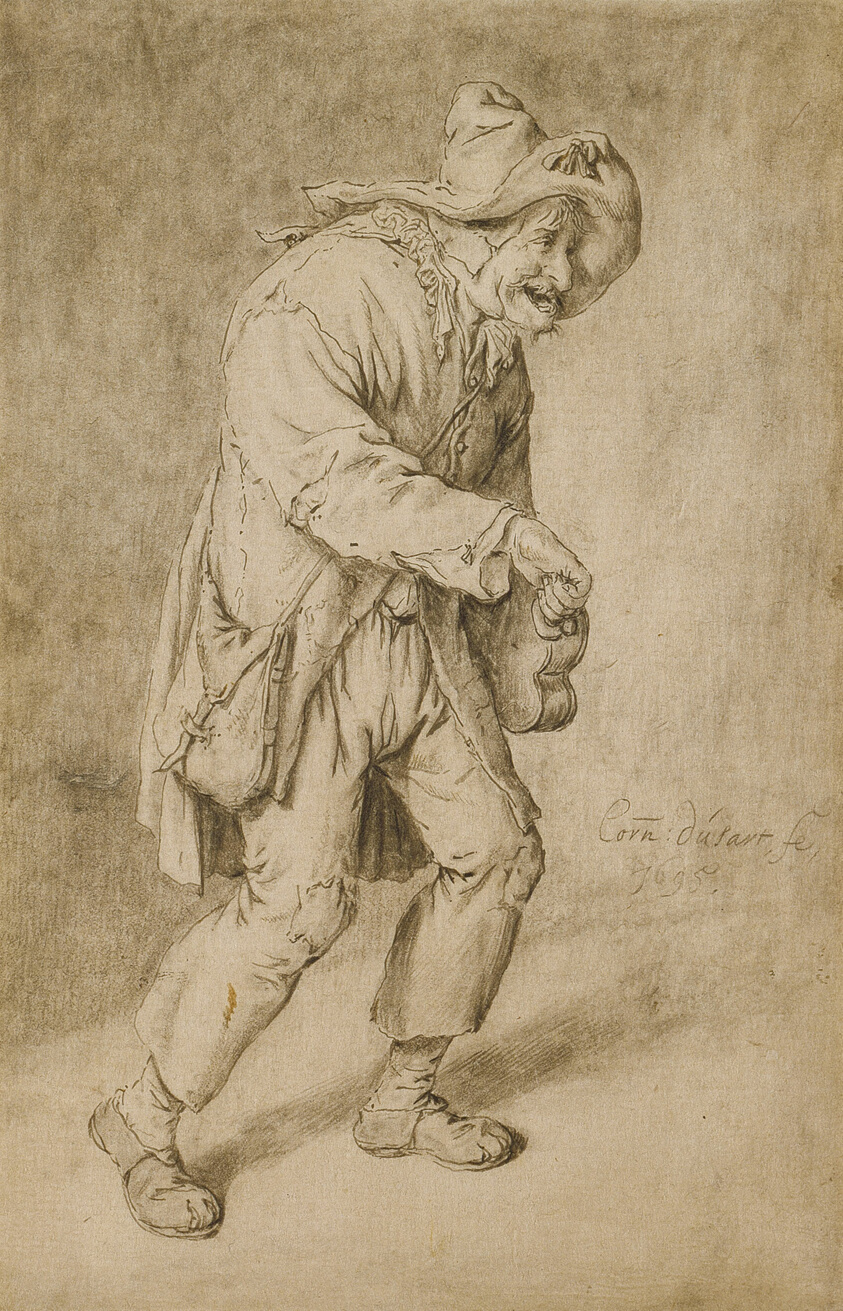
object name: Drawing and Watercolor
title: Hurdy-Gurdy Player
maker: Cornelis Dusart (Dutch, 1660-1704)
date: 1695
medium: Pen and black ink, with black chalk and touches of black crayon, on cream Japanese paper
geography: Holland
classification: graphite; drawings (visual works); prints and drawing